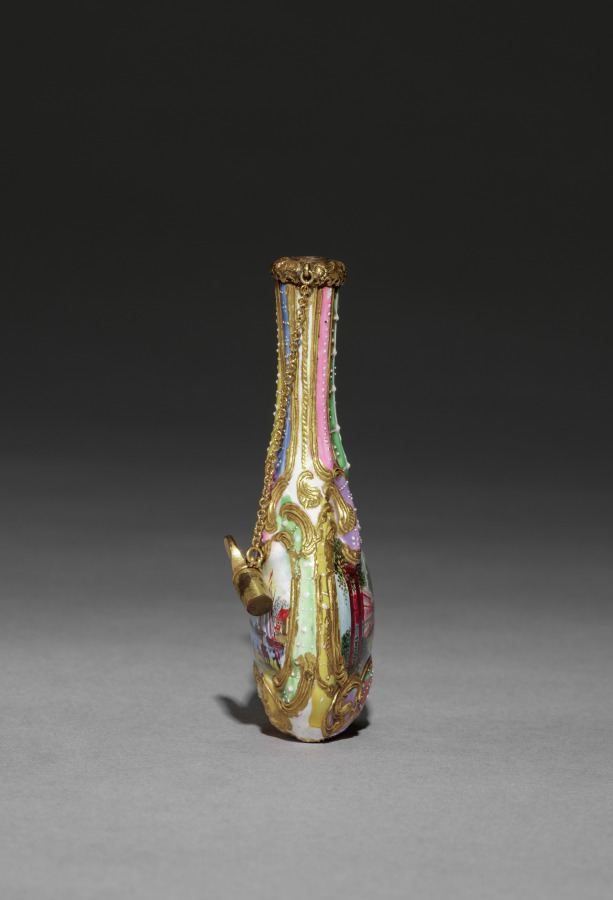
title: Scent Bottle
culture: England, Staffordshire, 18th century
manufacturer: Staffordshire Factory (British)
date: 1700s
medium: enamel on copper with metal mounts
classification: Miscellaneous